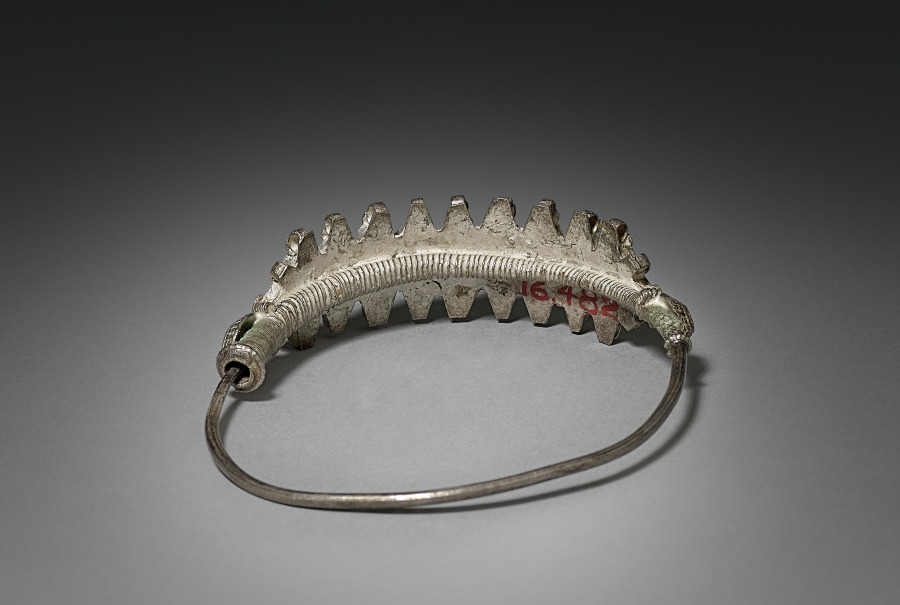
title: Nose Ring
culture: India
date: early 1900s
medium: silver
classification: Jewelry